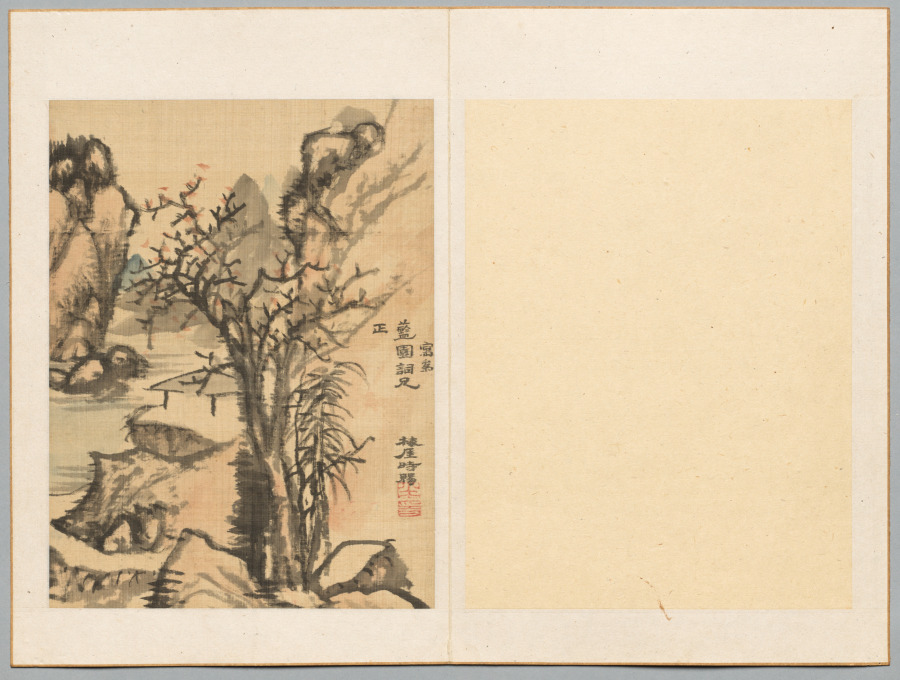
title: Landscape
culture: Japan, Edo period (1615–1868)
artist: Totoki Baigai (Japanese, 1749–1804)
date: late 1700s-early 1800s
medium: leaf from a pair of folding albums; ink and light color on paper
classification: Portfolio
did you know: In 1790 Totoki Baigai received permission to visit the closed port city of Nagasaki, where one could meet actual Chinese painters, but, after overstaying his permit, Baigai lost his job.